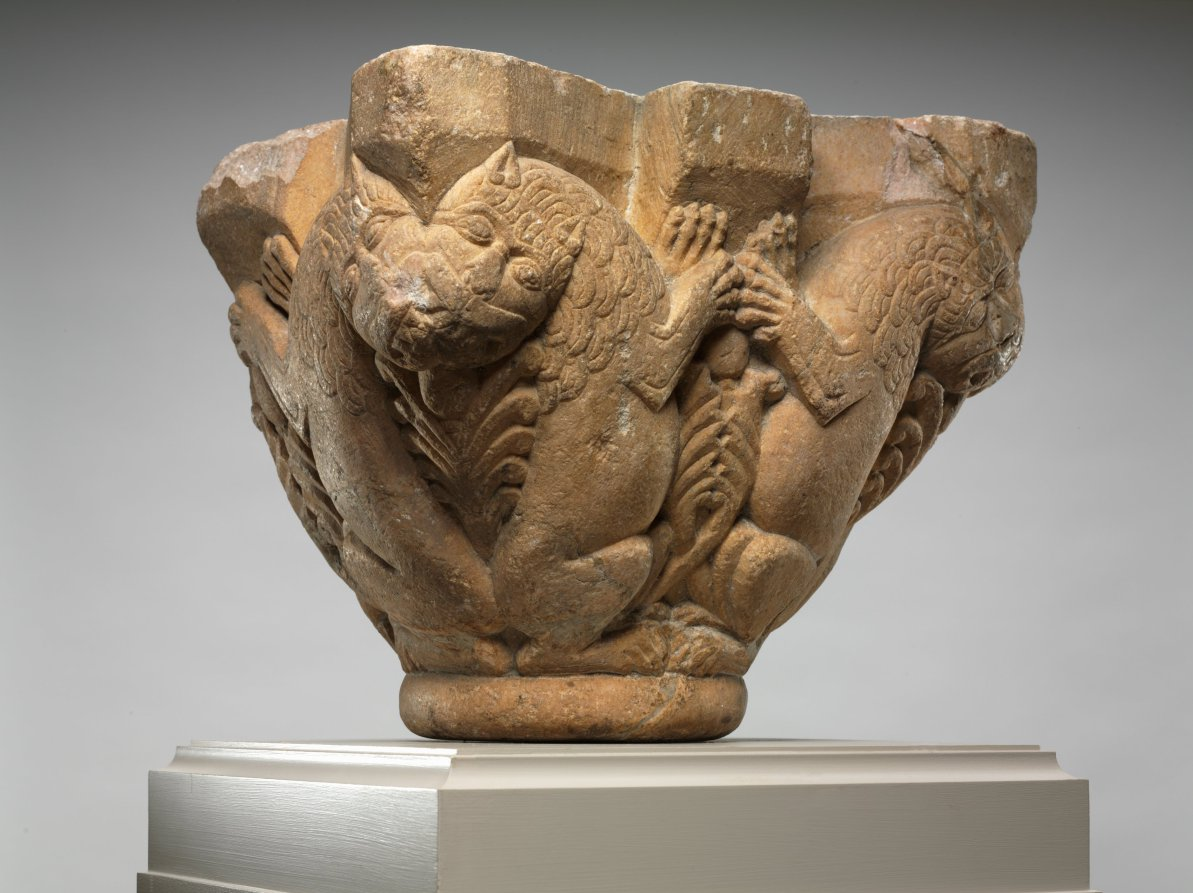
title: Engaged Capital with Lions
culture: Northern Spain (Navarre ?) or Southwest France (Pyrénées or Roussillon ?), mid-12th century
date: 1145–64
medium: marble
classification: Sculpture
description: The compositional motif of confronted and addorsed beasts illustrated on this capital was especially popular in churches along the pilgrimage roads.